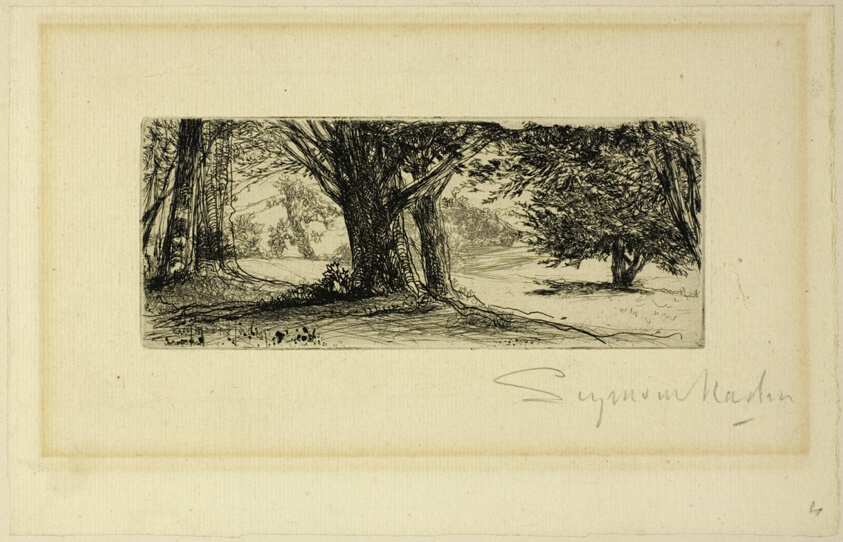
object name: Print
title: The Holly Fields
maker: Francis Seymour Haden (English, 1818-1910)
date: 1860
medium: Etching with drypoint on ivory laid paper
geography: England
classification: etching; print; prints and drawing